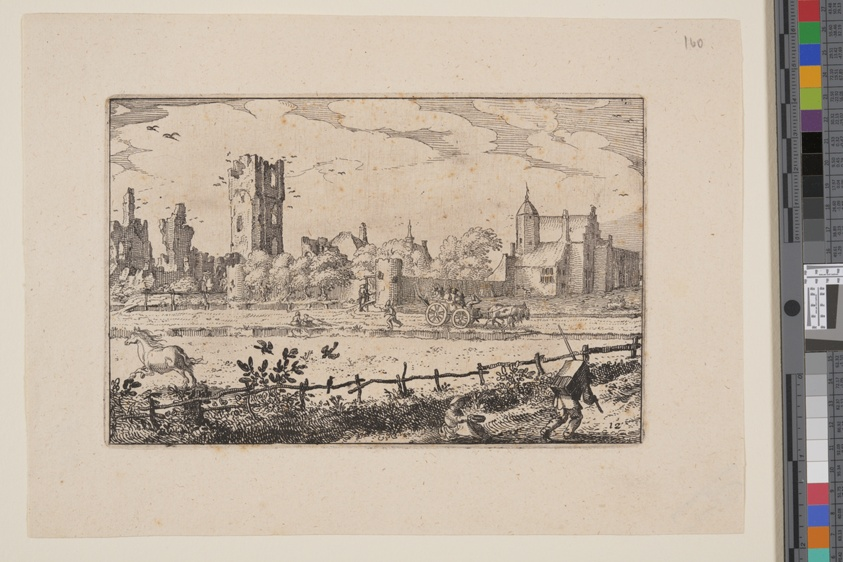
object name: Print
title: Het Huis te Cleef, near Haarlem, from Views in the Surroundings of Haarlem (Plaisante Plaetsen)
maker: Claes Jansz. Visscher (Netherlandish, c. 1550–c. 1612)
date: 1610/20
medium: Etching on ivory laid paper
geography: Netherlands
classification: print; paper; prints and drawing; etching